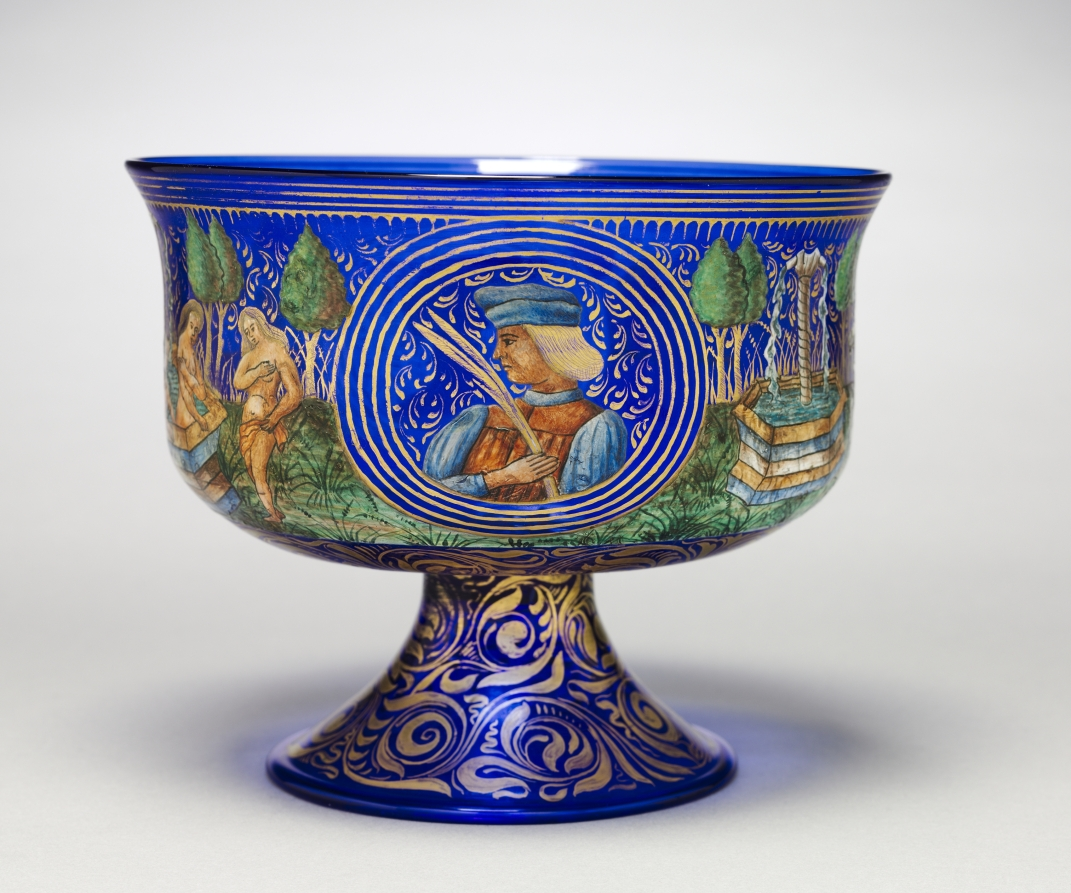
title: Footed Bowl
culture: Italy, Venice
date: 1850–99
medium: glass decorated with polychrome enamel and gilt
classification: Glass